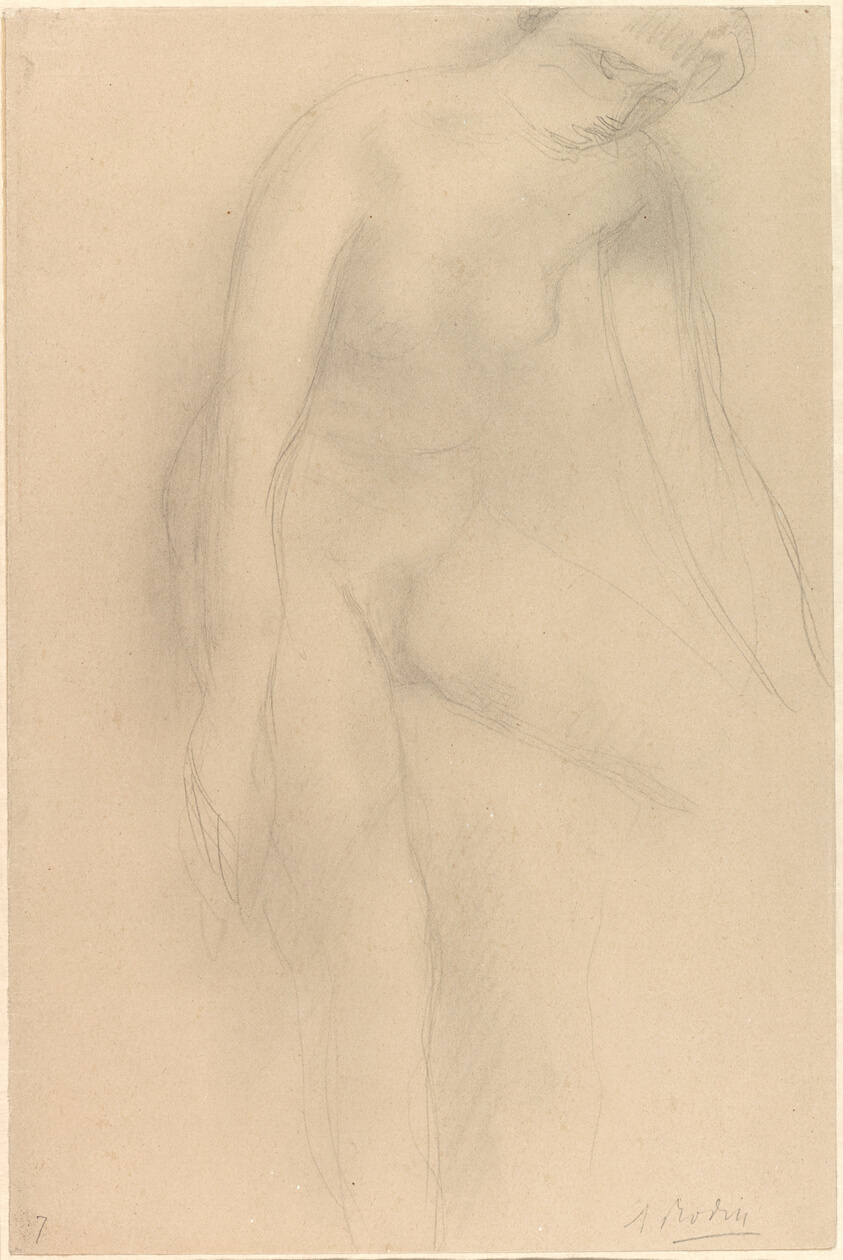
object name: Drawing and Watercolor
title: Standing Female Nude, Bending Forward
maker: Auguste Rodin (French, 1840-1917)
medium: Graphite, with stumping, on tan wove paper, laid down on buff wove paper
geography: France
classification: graphite; drawings (visual works); prints and drawing